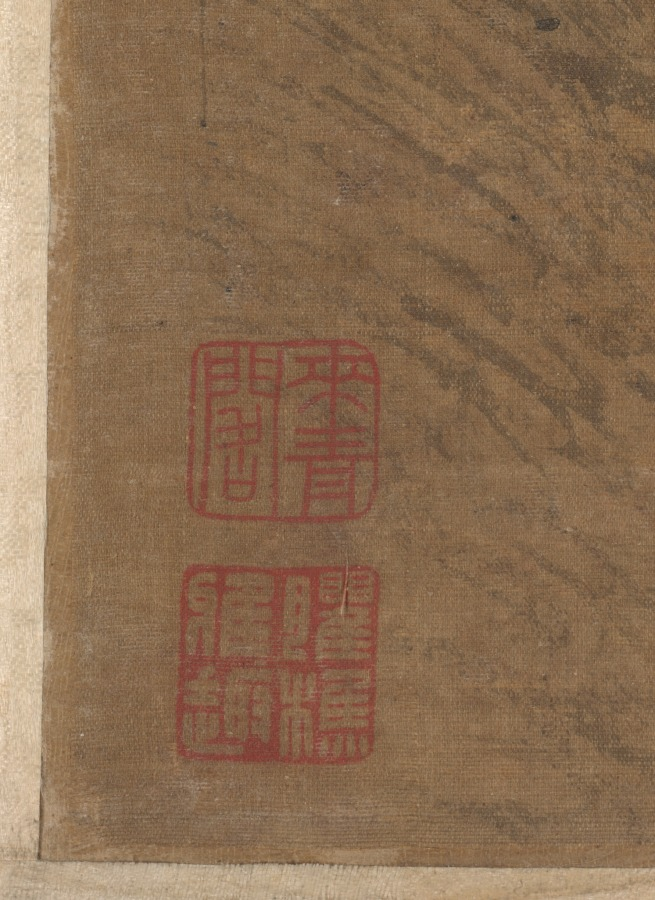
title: Landscape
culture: China, Qing dynasty (1644-1911)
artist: Wang Hui (Chinese, 1632–1717)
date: 1632–1717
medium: hanging scroll, color on silk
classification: Painting